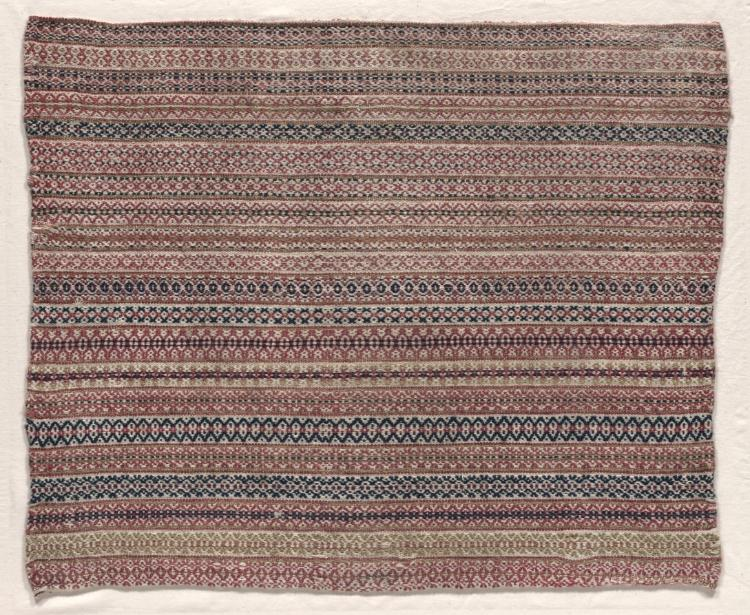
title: Woven Wool Textile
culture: Sweden, Dalecarlia, early 19th century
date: early 19th century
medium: wool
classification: Textile